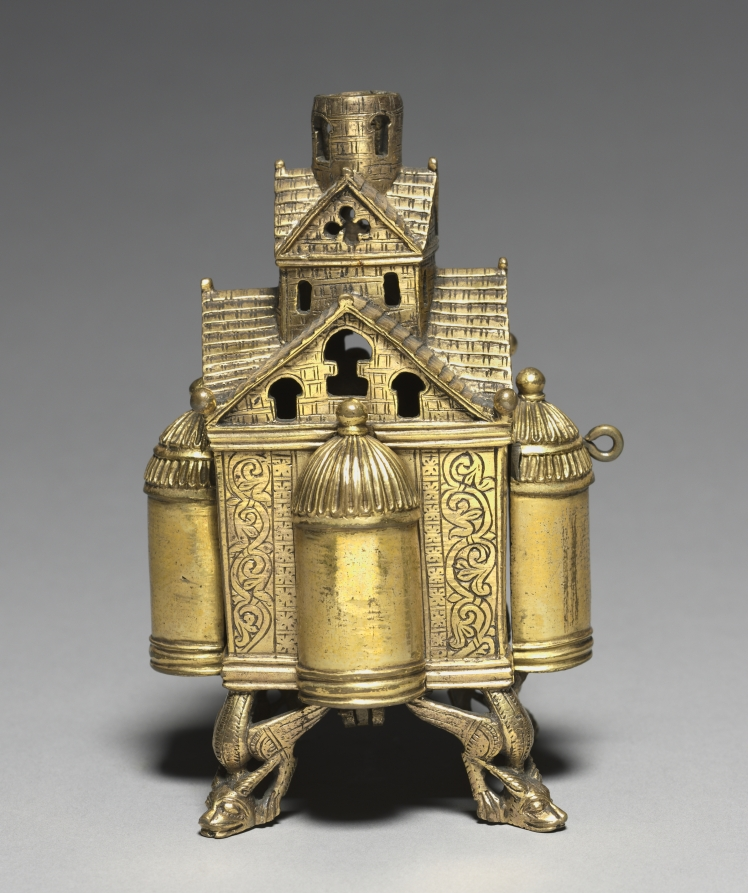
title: Incense Burner and Stand for an Altar Cross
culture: Germany, Lower Saxony, Hildesheim?, Romanesque period, 12th century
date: 1150–75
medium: bronze: cast, gilded, engraved, and chased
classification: Metalwork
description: Supported by dragon-shaped feet on its corners, this unusual object is fashioned like a small, centralized church with gabled roofs, a lantern crowned by a turret, and four semi-circular apses. Traces of soot on the interior walls of a nearly identical object in the Kunstgewerbemuseum in Berlin indicate that these objects once served as incense burners. The objects’ design with an open turret in the center of the roof further suggests that they may have doubled as stands for altar crosses. The fact that both objects formerly belonged to the Bouvier Collection in Amiens may be taken as an indication that they were made as a pair in the same 12th-century workshop.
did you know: This object may been have created for a traveling court with its entourage to use for Catholic Mass, where incense could be used in an easily transportable vessel.